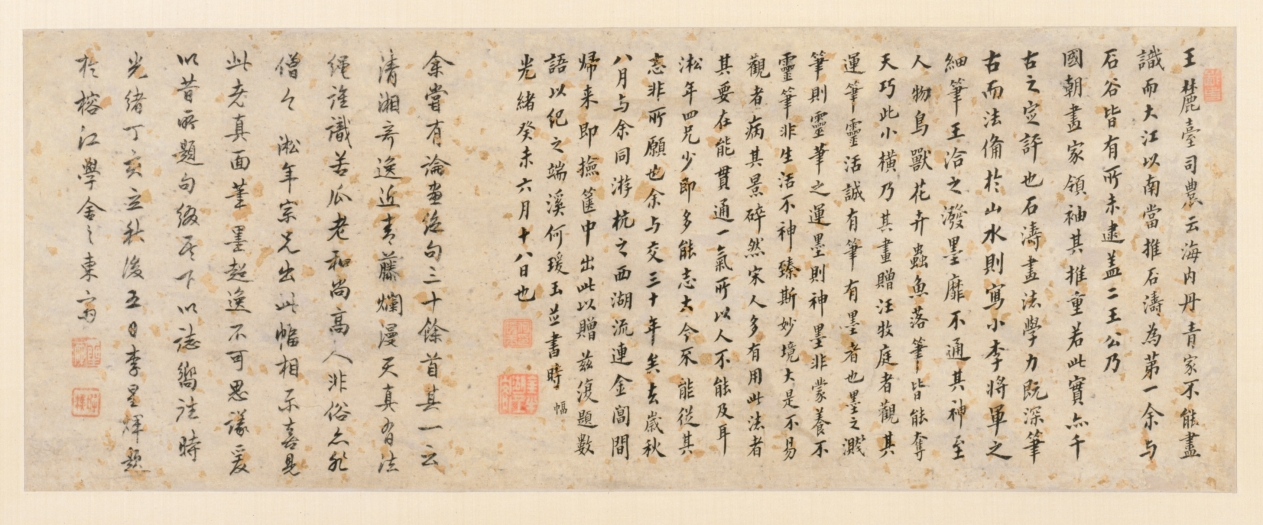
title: Spring Mist over Jiangnan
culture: China, Qing dynasty (1644-1911)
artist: Shitao (Chinese, 1642–1707)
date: 1697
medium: Hanging scroll; ink and light color on paper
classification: Painting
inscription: 揚子橋邊江水泛，柳絲弄色不管人白頭。/ 一春雨雪阻遊屐，梅花尚可清明留。/ 老去無聊藉朋輩，年來星散隨波鷗。/ 汪子無端向我發長嘯，吾將縱覧閩澥之奧妙。/ 請君置我先向畫圖看，眼前丘壑都一掃。/ 千里萬里毫端見，非墨非煙聊寄傲。/ 君家嚴親百代才，一言奏對驚風雷。/ 天子非常賜顏色，灜台稱旨今南來。/ 多少寒灰待君活，看君作意為龍媒。 丁丑春題畫，贈汪子牧庭之閩海。兼呈思白學使。清湘老人濟大滌堂下。[印]原濟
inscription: 2 colophons and 7 additional seals: 1 colophon and 4 seals of He Yuanyu 何瑗玉 (1840-?); 1 colophon and 2 seals of Li Xinhui (19th-20th c.); 1 seal unidentified.